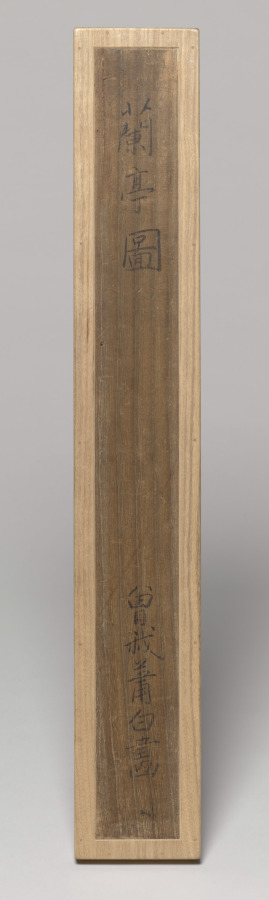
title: Orchid Pavilion Gathering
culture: Japan, Edo period (1615–1868)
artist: Soga Shōhaku (Japanese, 1730–1781)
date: 1777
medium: hanging scroll; ink on silk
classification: Painting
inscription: Inscribed upper right: Sixth year of An'ei (1777) mid-winter, Soga Shohaku Seal: Dasokken Shohaku Seal: Unread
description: This painting depicts a famous gathering that took place in China in AD 353 to celebrate the Spring Purification Festival, also known as the Double Third Festival, as it takes place on the third day of the third lunar month. The host invited everyone to the Orchid Pavilion to compose poetry and drink wine. Guests floated wine cups down a nearby creek, and where they landed, people had to drink the wine and compose a poem.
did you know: The Buddhist temple Bairinji in Kurume City, Fukuoka prefecture, Japan, and the National Gallery of Victoria in Melbourne, Australia, own compositions by the same artist on the same theme.